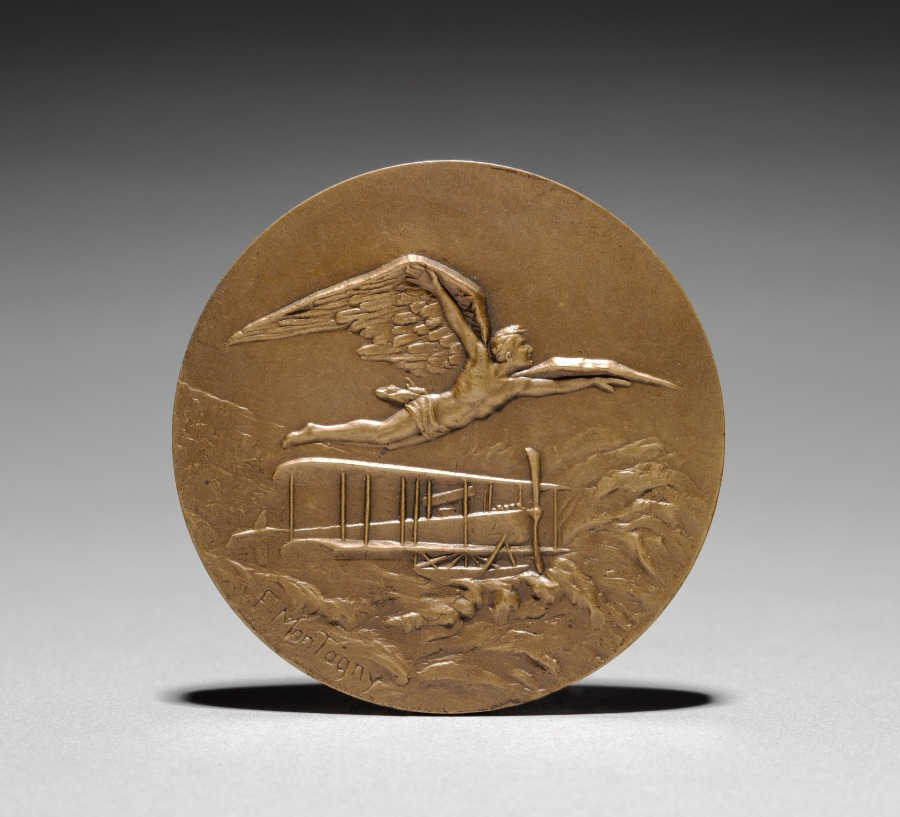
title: Medallion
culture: France, 19th century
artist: F. Montagny (French)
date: c. 1921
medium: bronze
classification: Metalwork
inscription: signed: "F. Montagny."